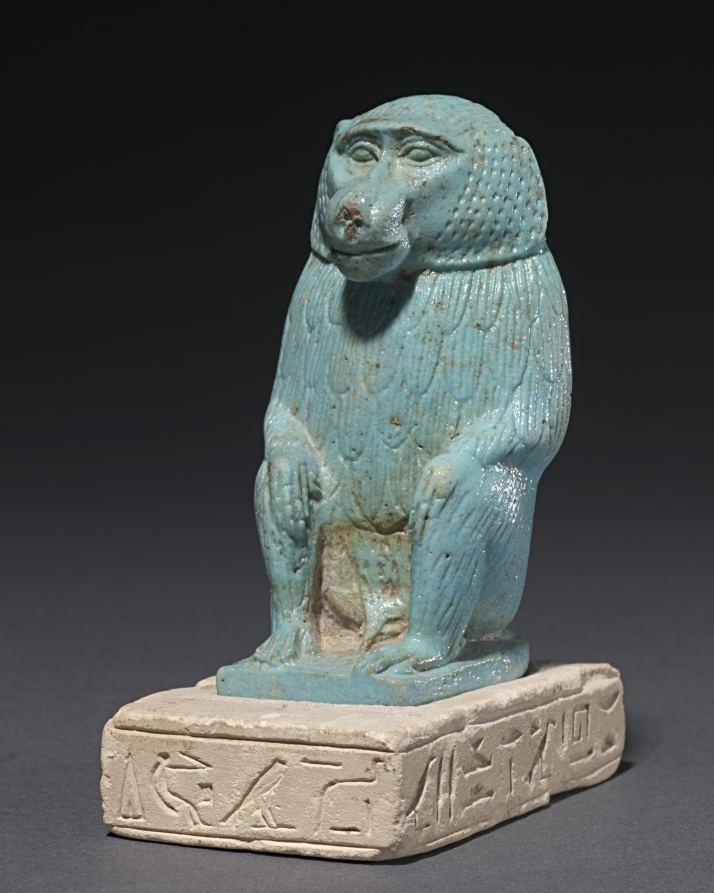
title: Baboon on a Limestone Base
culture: Egypt, Late period (715–332 BCE), Dynasty 30–Greco-Roman period (332 BCE–395 CE), Ptolemaic dynasty (305–30 BCE)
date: 380–30 BCE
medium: pale turquoise faience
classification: Sculpture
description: This finely carved Papio hamadrayas baboon squats low on a base, hands on knees in a traditional pose, copied from nature. Mane and mantle are incised with a scalloped pattern to imitate tufts of fur, and the sides of the face are stippled or dotted. The separate limestone base is ancient; judging by the inscription it does not belong with the statuette, which has been glued onto it in modern times. It reads, "Words spoken by Harpocrates, given life and health, lord of heaven, (on behalf of) Padiuser, the son of Usernakht and [mother's name uncertain]." The baboon is the sacred animal of Thoth, god of the moon and of writing, and guide of the deceased in the underworld. Thoth's cult reached immense popularity in the Late and Ptolemaic periods (the Greeks identified him with Hermes). Statuettes of Thoth as a baboon are common, although not nearly as numerous as presentations of Thoth's other animal manifestation, the sacred Ibis.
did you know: The statuette is made from Egyptian faience and is glazed with a pale, semigloss turquoise.